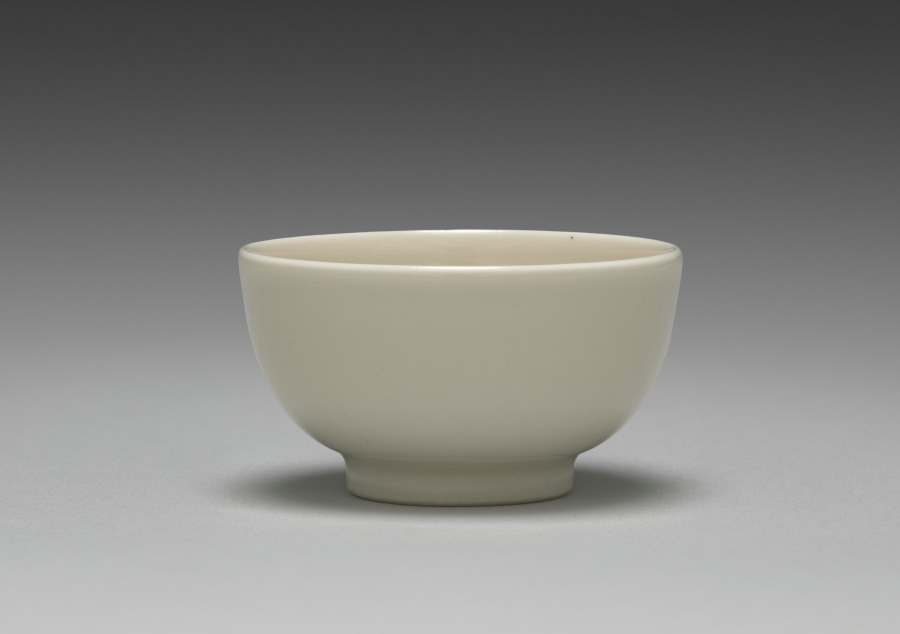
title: Sake Cup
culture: Japan, Meiji period (1868–1912)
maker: Seifū Yohei III (Japanese, 1851–1914)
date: c. 1893–1914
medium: porcelain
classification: Ceramic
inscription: 清風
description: Seifū Yohei III was the first ceramist to be designated an Imperial Household Artist, a position that came with an annuity. He was tasked with producing items need by the imperial household to decorate the Meiji Palace and to present to state guests as gifts.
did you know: There are subtle bamboo leaflike shapes on the interior of the sake cup.